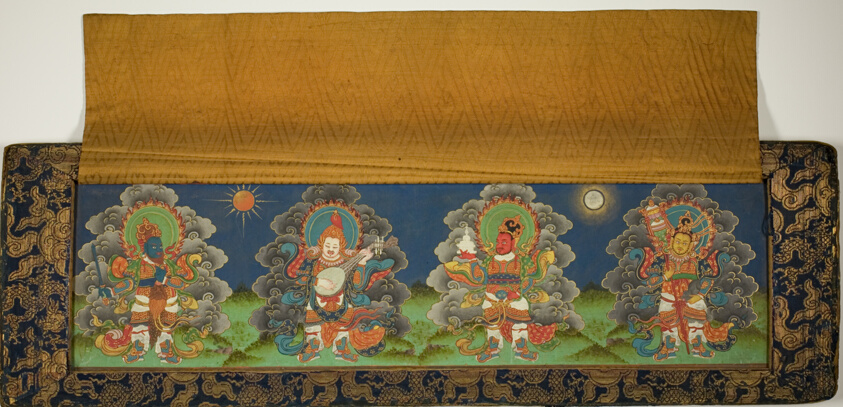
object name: Painting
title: Final Page and Back Cover of Buddhist Manuscript With Four Guardian Kings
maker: Mongolia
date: 17th/18th century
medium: Wood, ink, opaque watercolor, and gold on paper, with silk border and dust cover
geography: Mongolia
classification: pen and ink drawings; manuscript; asian art; painting